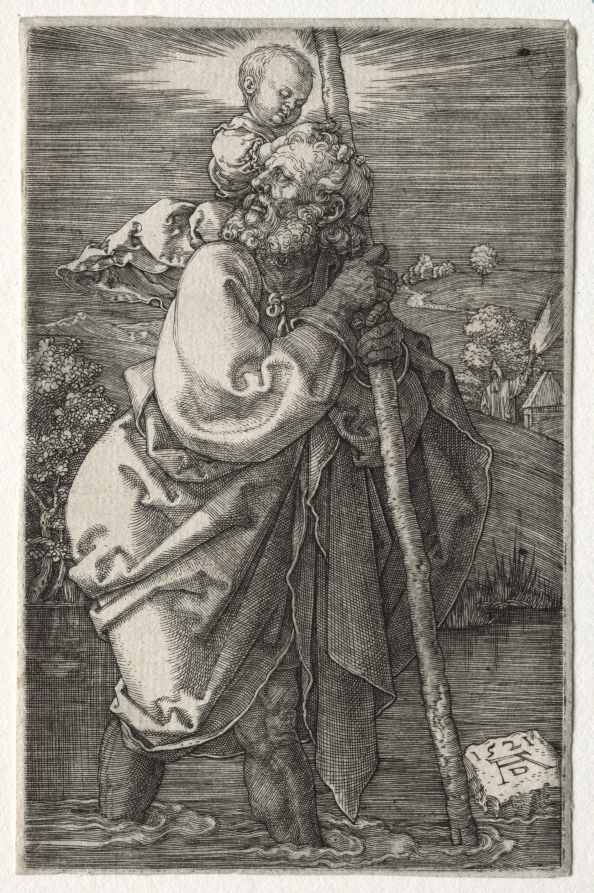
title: St. Christopher, Facing to the Left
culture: Germany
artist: Albrecht Dürer (German, 1471–1528)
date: 1521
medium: engraving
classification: Print